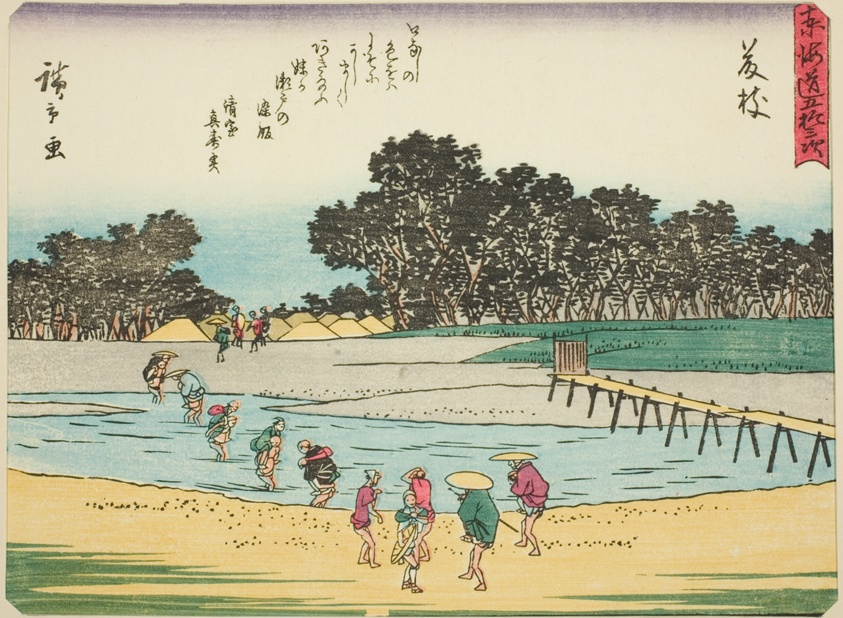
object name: Print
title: Fujieda, from the series "Fifty-three Stations of the Tokaido (Tokaido gojusan tsugi)," also known as the Tokaido with Poem (Kyoka iri Tokaido)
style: Japanese (culture or style)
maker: Utagawa Hiroshige 歌川 広重; Japanese, 1797-1858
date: c. 1837/42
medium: Color woodblock print; chuban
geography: Japan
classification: woodblock print; print; asian art